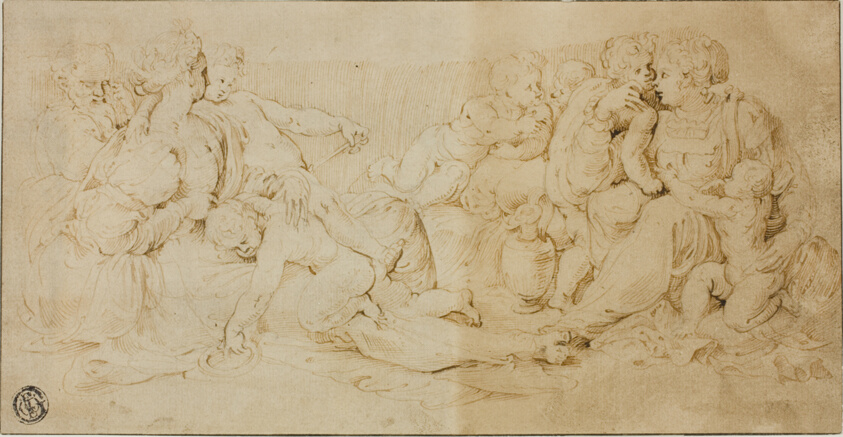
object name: Drawing and Watercolor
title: Seated Women, Children, and Old Man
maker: Unknown Cremonese Artist; Italian, mid-16th century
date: 1540/60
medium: Pen and brown ink, over traces of graphite, on tan laid paper, laid down on ivory laid paper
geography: Italy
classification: pen and ink drawings; drawings (visual works); prints and drawing